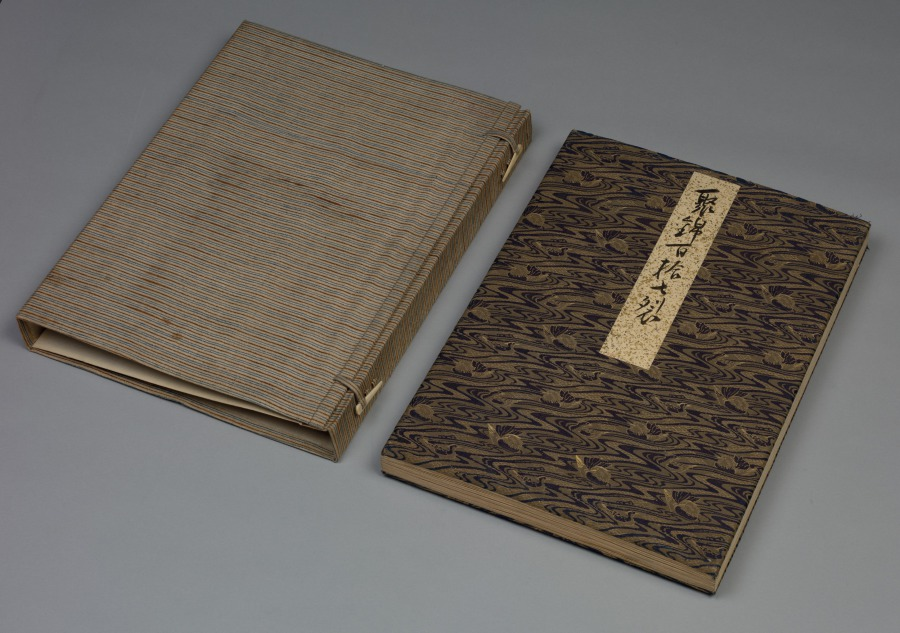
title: Album of Textile Samples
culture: Japan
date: 1790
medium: silk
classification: Textile